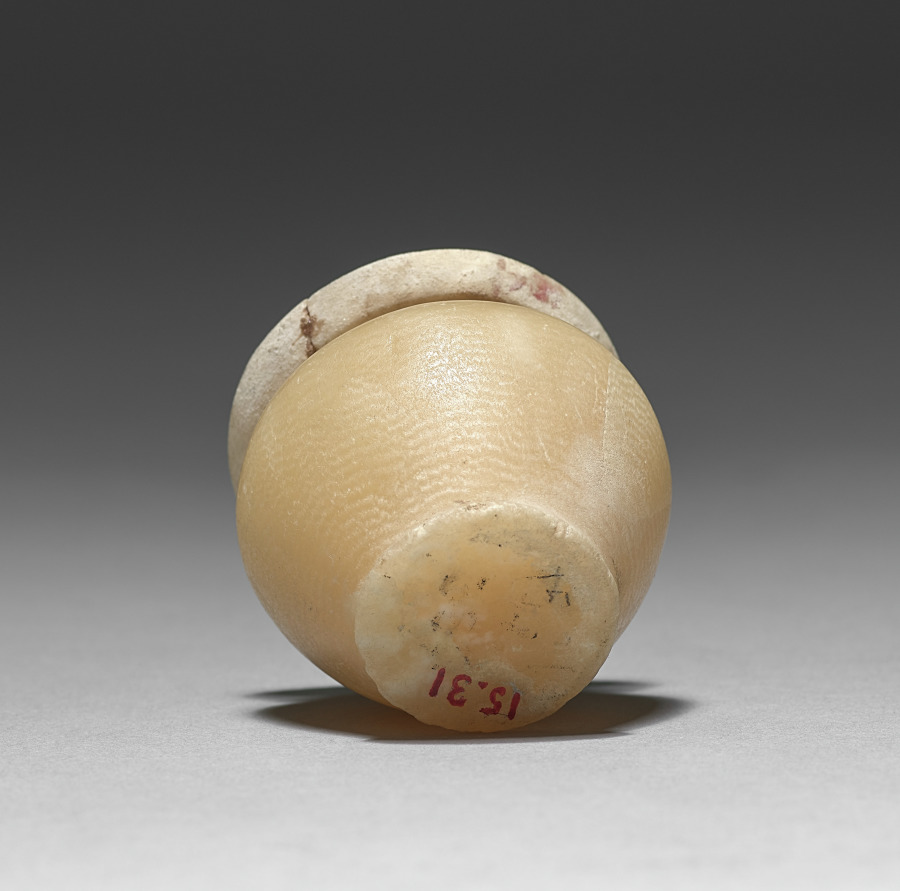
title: Kohl Jar with Lid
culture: Egypt, Middle Kingdom (2040–1648 BCE), Dynasty 12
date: 1980–1801 BCE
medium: travertine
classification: Vessels